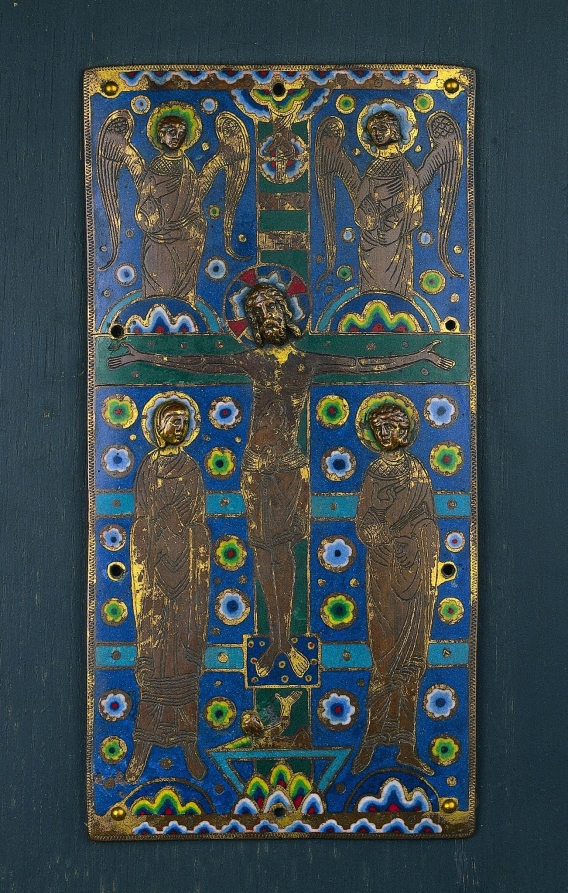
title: Plaque from a Book Cover with the Crucifixion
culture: France, Limousin, Limoges, Gothic period, 13th century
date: 1200–1250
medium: copper: gilded, engraved, chased; champlevé enamel; wood core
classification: Enamel